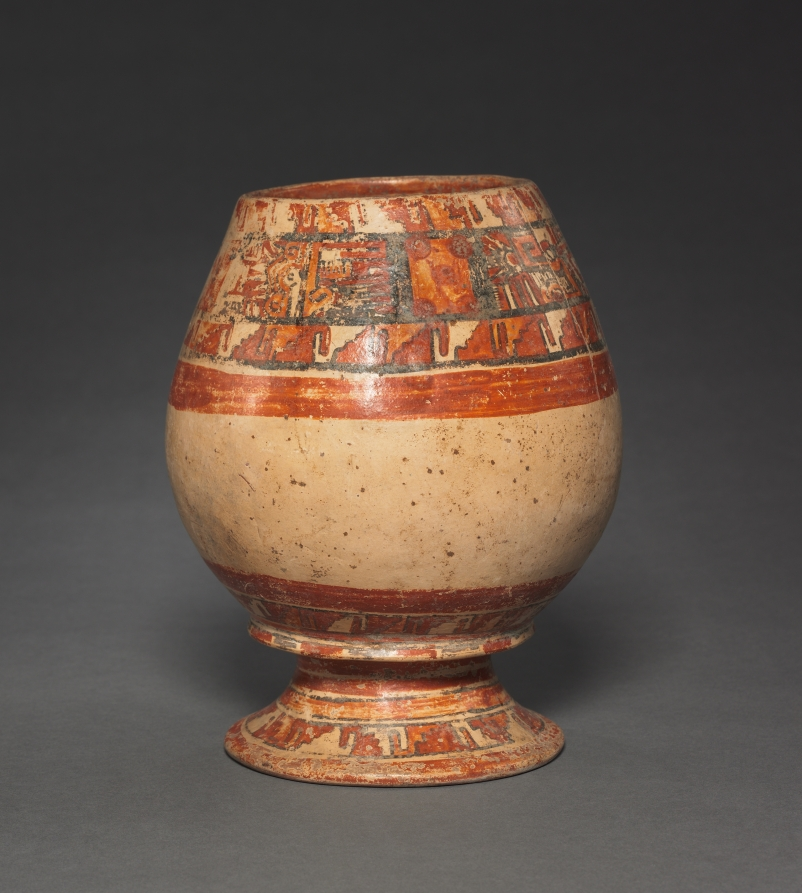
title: Vase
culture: Costa Rica, Filadelphia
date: 1000–1550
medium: earthenware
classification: Ceramic